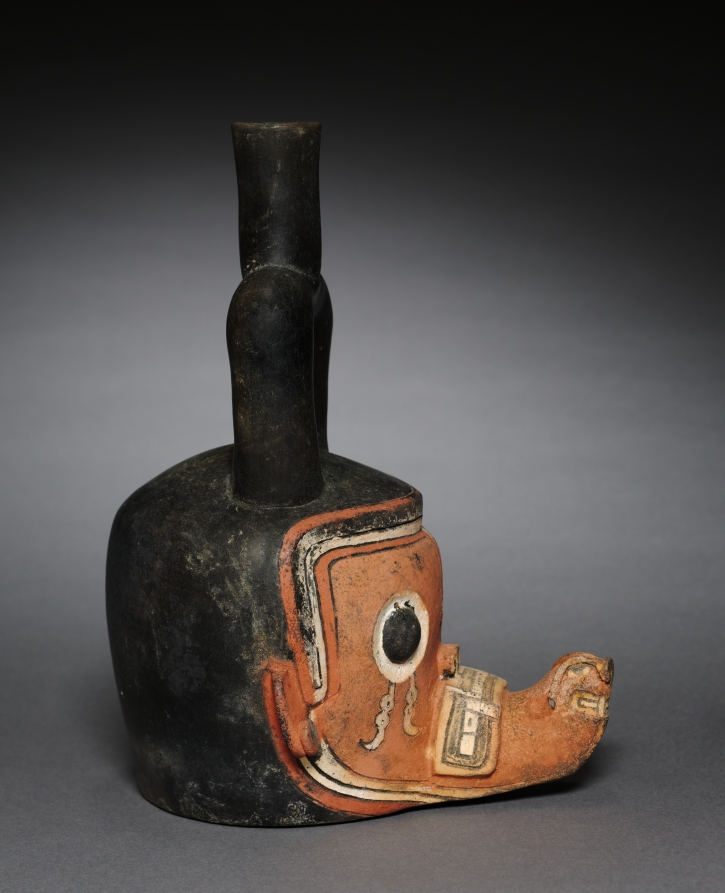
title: Deity-Head Vessel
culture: Peru, North Coast, Tembladera people, Early Horizon (900-400 BCE)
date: 900–400 BCE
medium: ceramic with pigment applied after firing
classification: Sculpture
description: This is a stirrup-spouted vessel shaped as the effigy of a deity head with bulging, circular eyes from which hang pendants. A fanged, bandlike mouth is arranged horizontally on top of a projecting chin that is tipped with a three-dimensional, zoomorphic head. A chin strap reaches between two modeled knobs that double as ear ornaments, and the underpart of the chin is ornamented with chevrons. The face is painted red, yellow, and white over the burnished gray-black surface of the ceramic.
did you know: The Tembladera style is one of several very early styles that developed on the northern desert coast of Peru.